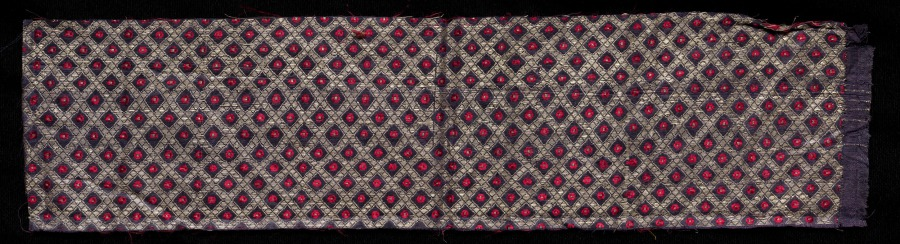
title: Fragment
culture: India, 19th century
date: 1800s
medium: brocade; silk and metal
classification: Textile